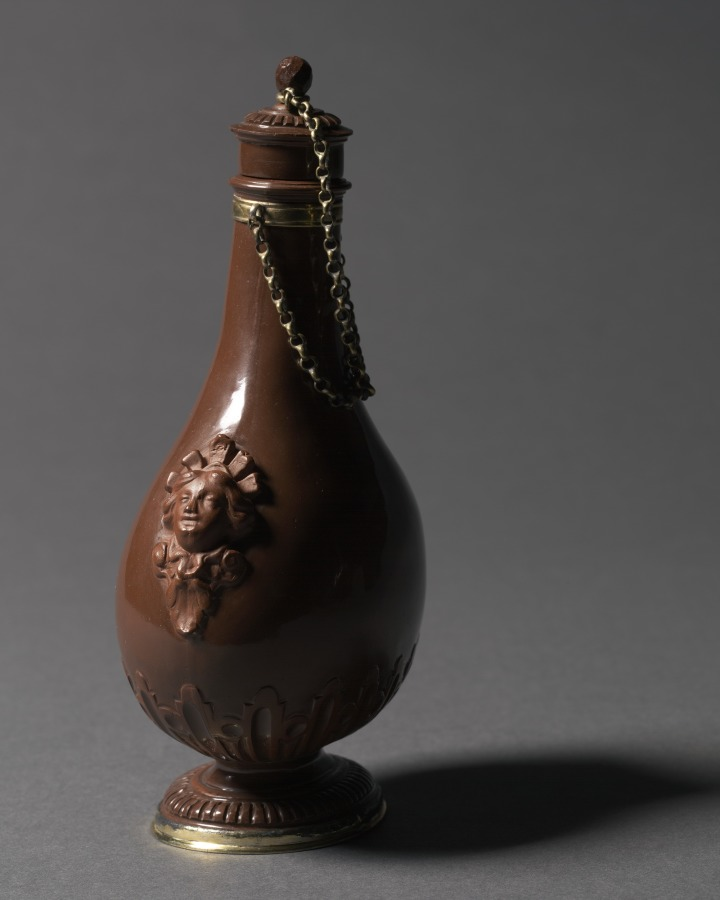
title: Pilgrim Bottle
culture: Germany, Meissen, 18th century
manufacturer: Meissen Porcelain Factory (German, est. c. 1710)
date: c. 1715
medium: polished red stoneware, silver-gilt mounts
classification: Ceramic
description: Throughout the early 1700s porcelain was imported to Europe from China and Japan, until the correct formula to produce it was developed by Johann Friedrich Böttger and a collaborator, which led to the establishment of the Meissen factory in 1710. Red stoneware inspired by Chinese Yixing ware and white porcelain were produced in Meissen under Böttger. Its fine red stoneware was so hard that it could be polished on a lapidary’s wheel—as was the body of this bottle.